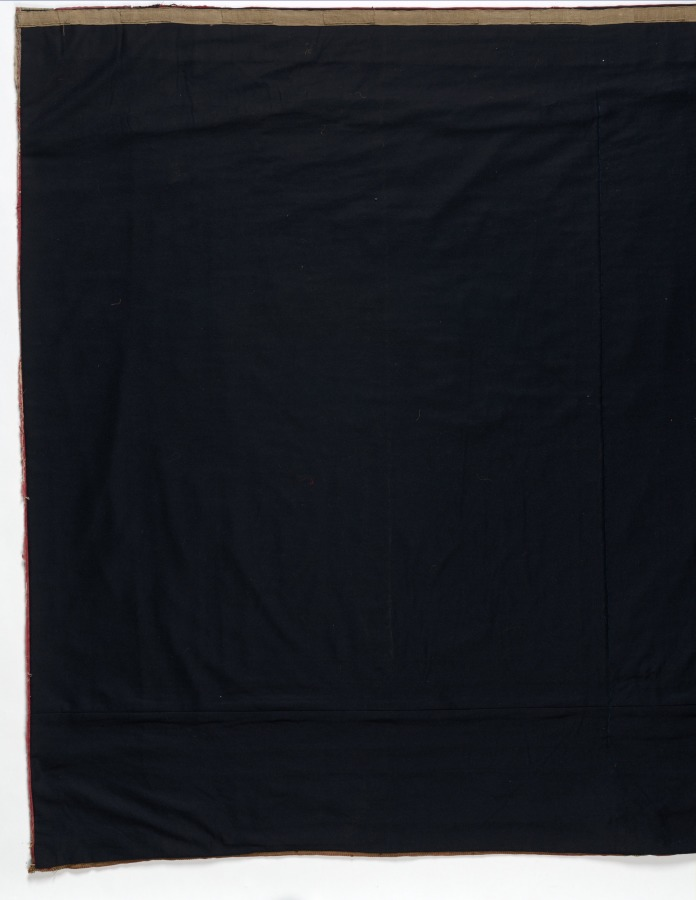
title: Royal Round Tent made for Muhammad Shah (wall panel with three design units)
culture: Iran, Rasht, Qajar period (1779-1925)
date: 1834–48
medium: Interior: wool: plain weave, inlaid work; silk: embroidery, chain stitch; tape, leather; Exterior: cotton, wool: plain weave; rope, iron ring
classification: Textile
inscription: Inscriptions: The central design unit of this wall panel has two embroidered inscriptions. 1. Upper inscription (center of the top blossom): "Muhammad shah sultan-e ghazi."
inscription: 2. Lower inscription (on the base of the vase): "Kamtarin bandeh-ye dargah fath'ali."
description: Royal tents were potent symbols of authority, wealth, and power throughout the greater Middle East. Rulers owned thousands of tents. They were used for shelter, shade, and innumerable functions in tent compounds that were essential for imperial ceremonies, travel, and military campaigns. Distinguished by size with elaborately decorated interior walls and ceilings, tents could be as large as castles. Opulent tents were also presented as imperial gifts. Tents are only known through documents before 1600. For example, in Baghdad in 809, Caliph Harun al-Rashid owned 4,000 ceremonial tents and 150,000 camping tents that were stored in the imperial Abbasid treasury. An astonishing variety and quantity of tents were housed in the royal Fatimid tent storeroom in Cairo in 1068-69, including "military tents, fortress tents, and castle tents, manufactured of . . . gold-brocaded stuff embroidered with designs of elephants, wild beasts, horses, peacocks, birds." Since 1600, Ottoman Turkish tents with elaborate floral decoration have been preserved in Istanbul in the Topkapi Palace Museum and Military Museum, and in European collections as war booty, primarily from the Ottoman Turks' attempt to conquer Vienna in 1683. These tents are not done in the Rasht technique, but rather are applique. In contrast, royal tents from Iran are extremely rare. This spectacular ceremonial tent is embroidered with the name of its owner, Muhammad Shah, who ruled Iran from 1834 to 1848 during the Qajar dynasty. The radiant jewellike interior features exuberant flora, blossoming vines, and robust birds made with colored wool embellished with silk-thread embroidery.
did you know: Rasht work is named after the city on the Caspian Sea in present-day Iran, which was a major silk trade center with numerous textile workshops.